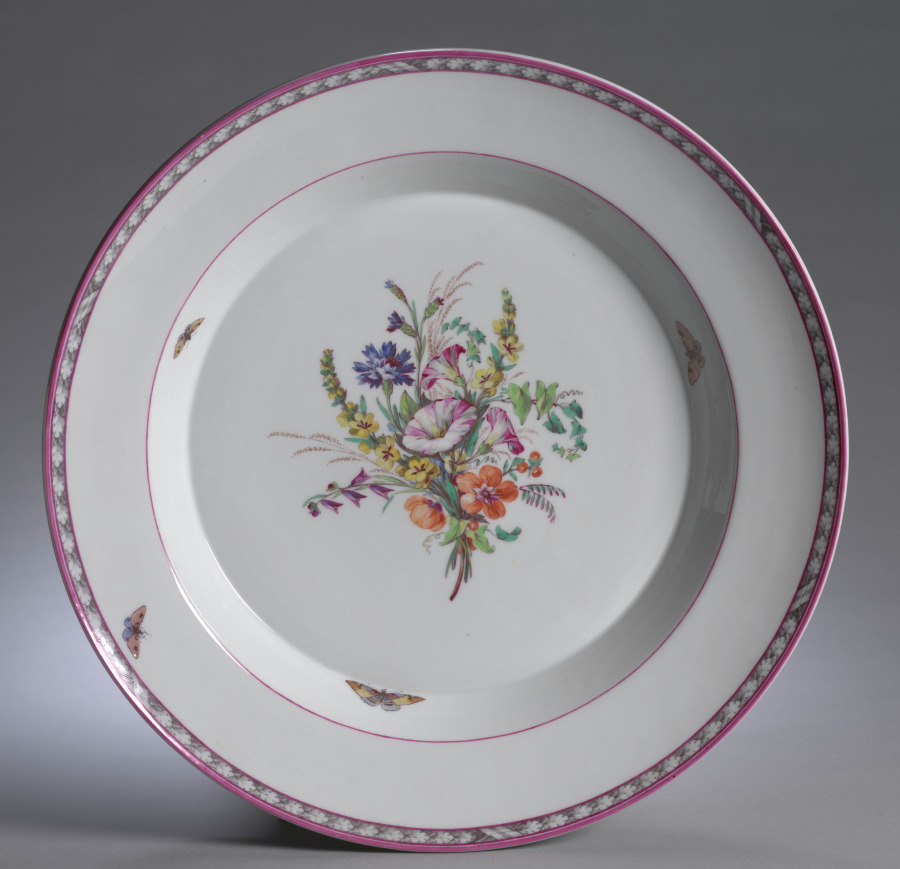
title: Platter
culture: Germany, Berlin, 18th century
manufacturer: Royal Porcelain Manufactory, Berlin (German)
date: 1763–1837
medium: porcelain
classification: Ceramic